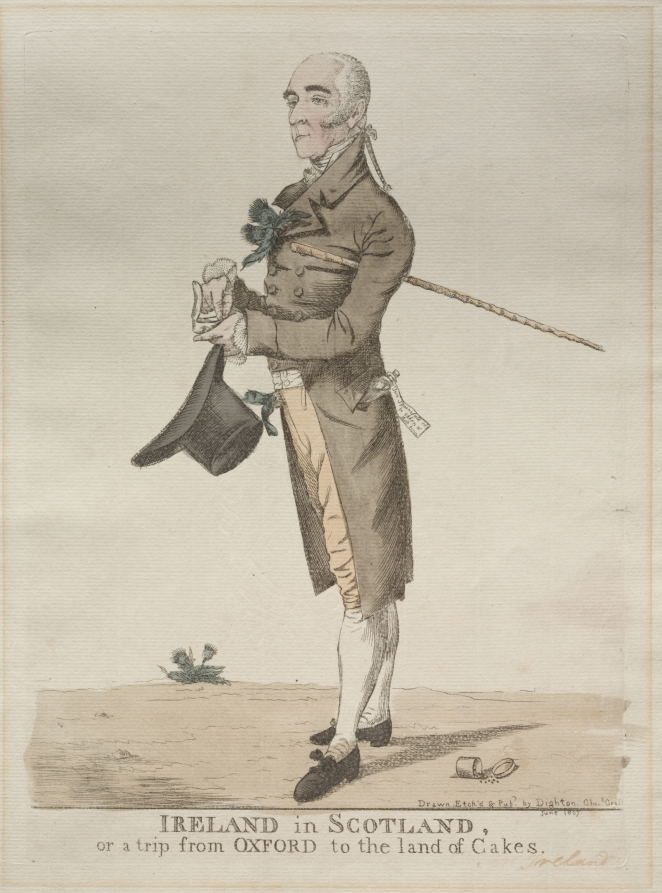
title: Ireland in Scotland, or a Trip from Oxford to the Land of Cakes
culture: England, 19th century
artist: Richard Dighton (British, 1795–1880)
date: 1807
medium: etching, hand colored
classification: Print